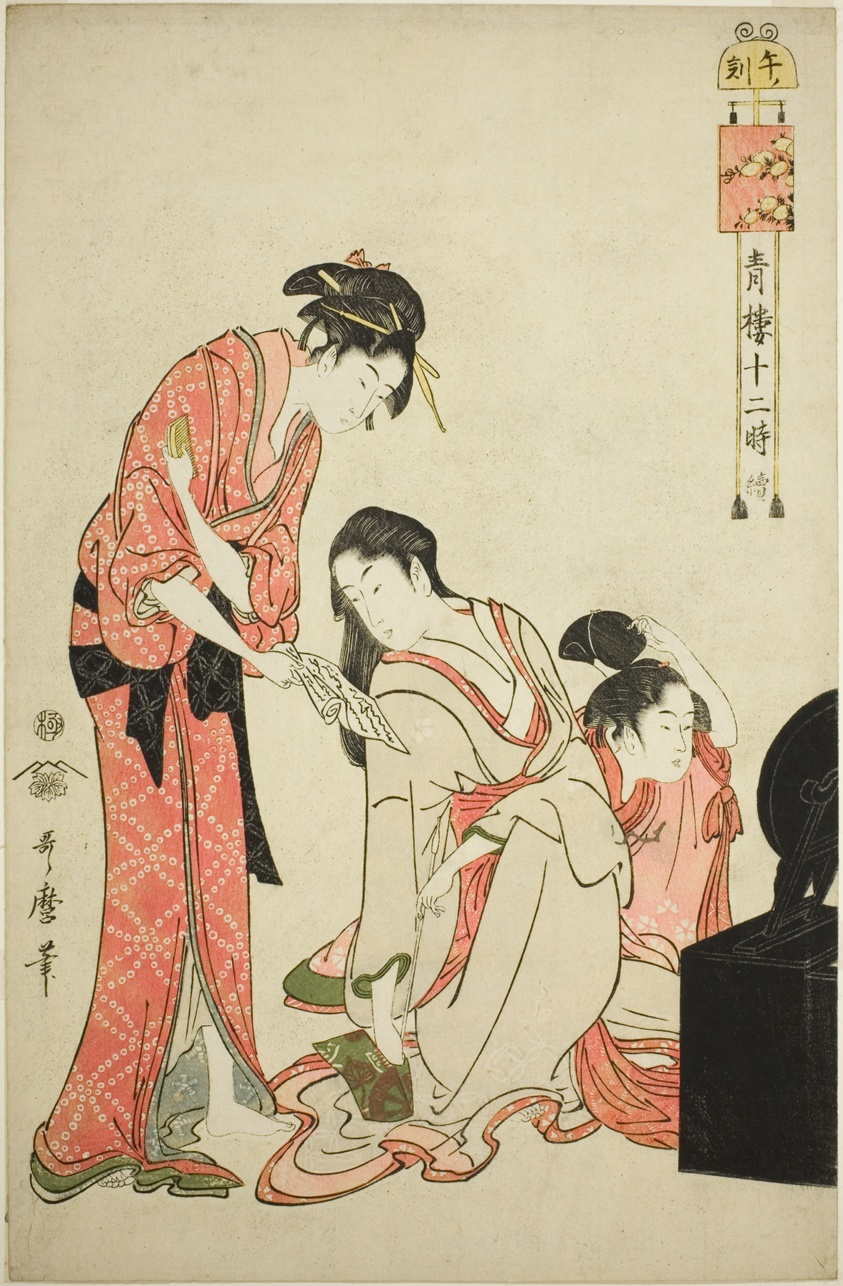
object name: Print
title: Hour of the Horse (Uma no koku), from the series "Twelve Hours in Yoshiwara (Seiro juni toki tsuzuki)"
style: Japanese (culture or style)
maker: Kitagawa Utamaro 喜多川 歌麿; Japanese, 1753 (?)-1806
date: c. 1794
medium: Color woodblock print; oban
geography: Japan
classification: woodblock print; print; asian art